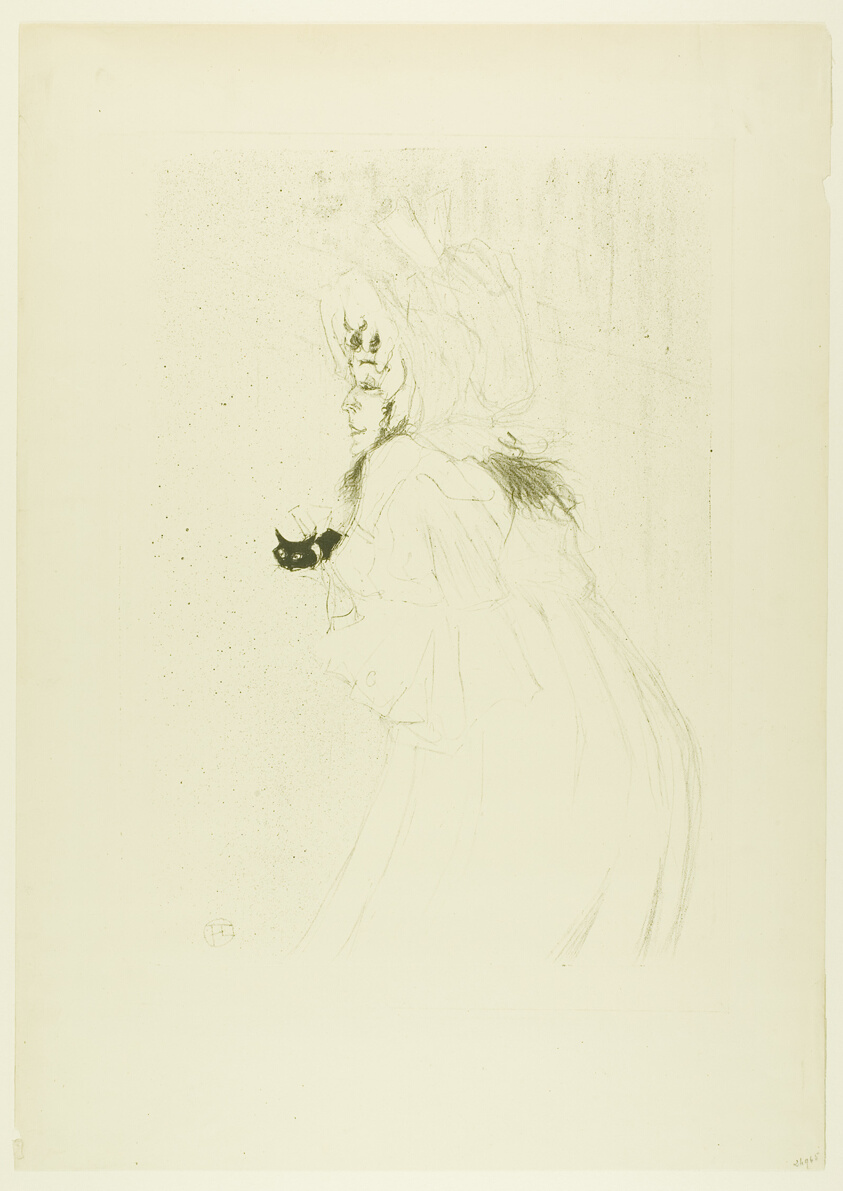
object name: Print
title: Miss May Belfort Taking a Bow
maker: Henri de Toulouse-Lautrec (French, 1864-1901)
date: 1895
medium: Color lithograph on cream wove paper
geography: France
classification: lithograph; print; prints and drawing